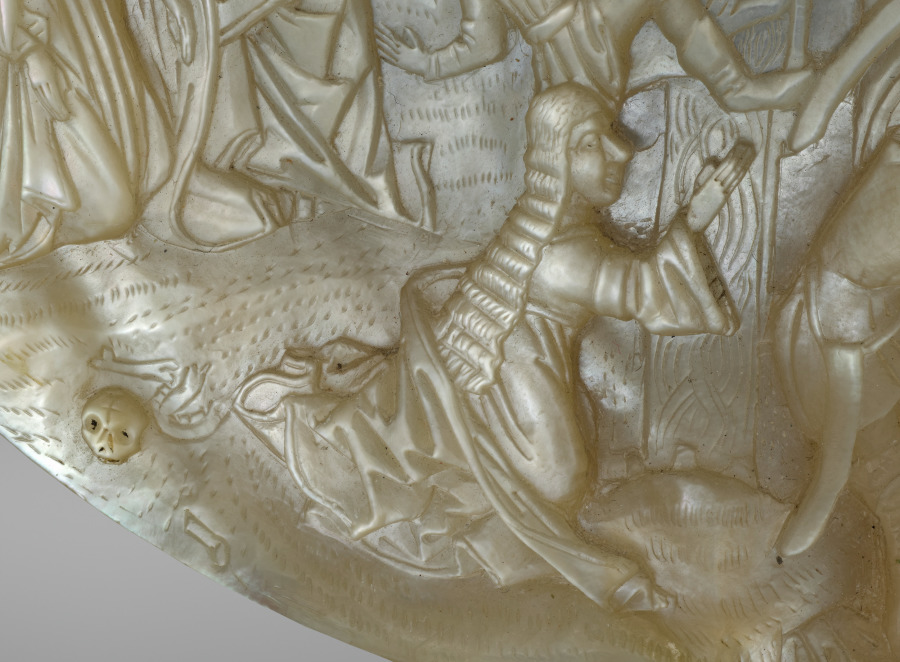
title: Calvary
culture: Germany, Middle Rhine?, 15th century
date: c. 1450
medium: mother-of-pearl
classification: Sculpture